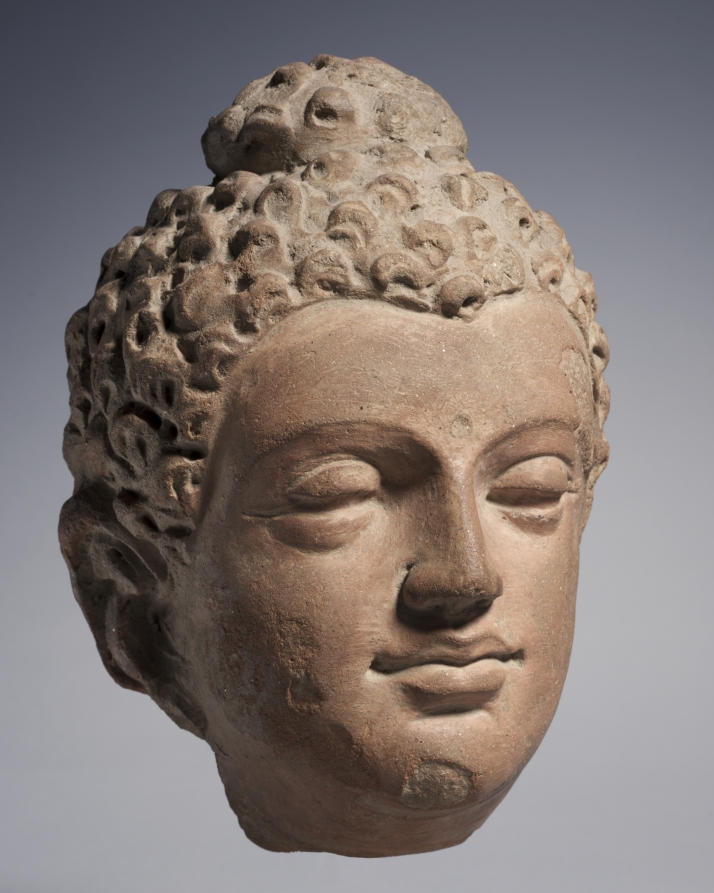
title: Head of Buddha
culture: India, Kashmir, Akhnur school, 8th century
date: 700s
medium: Clay, accidentally burned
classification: Sculpture